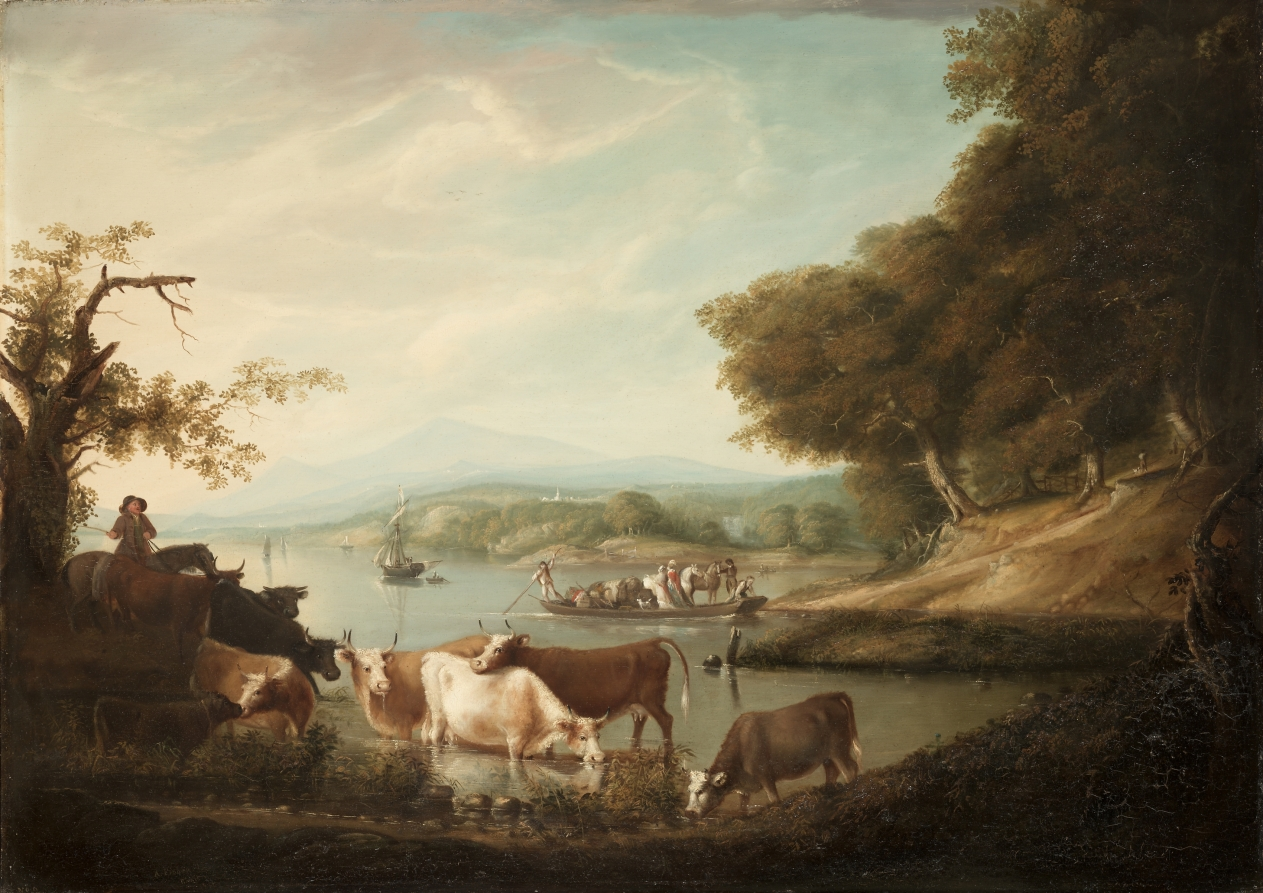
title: A Calm Watering Place--Extensive and Boundless Scene with Cattle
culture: America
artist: Alvan Fisher (American, 1792–1863)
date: 1816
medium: oil on panel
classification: Painting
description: In this prime example of Fisher’s early rural pictures, a ferry delivers two wealthy women and their belongings ashore, as a herd of especially handsome cattle rests in the foreground. Boston-based Fisher was among the first American artists to specialize in landscape, recalling that “This species of painting being novel in this part of the country, I found it a more lucrative, pleasant and distinguishing branch of the art than portrait painting.”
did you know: Some of his fellow artists hired Alvan Fisher to paint animals into their own works because he was so skilled at it.